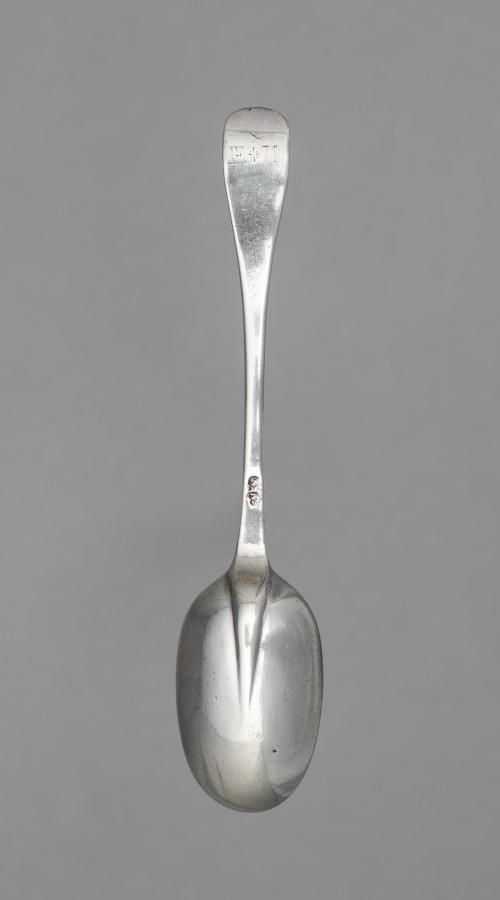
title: Teaspoon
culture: America, Rhode Island, Newport, 18th century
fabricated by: Samuel Vernon (American, 1683–1737)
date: c. 1720–1735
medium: silver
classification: Silver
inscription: engraved "E * M" on back of handle end (very worn).